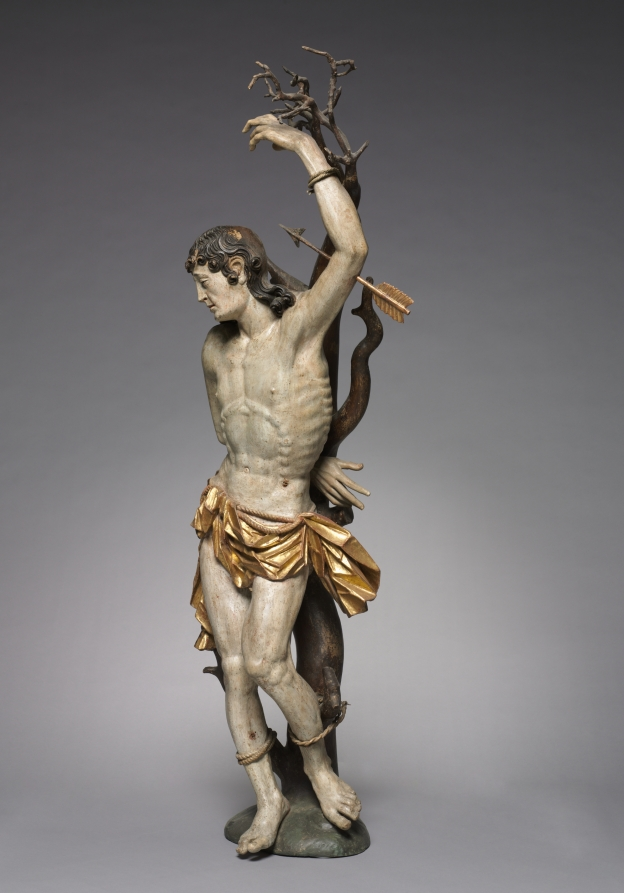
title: Saint Sebastian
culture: Germany, early 17th century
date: c. 1600–1620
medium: painted and gilded wood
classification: Sculpture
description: An early Christian saint and martyr, Sebastian was condemned to death by the Roman emperor Diocletian. Bound to a tree and shot with arrows, he survived—only later to be martyred by beating. This figure embodies the blend of stylistic influences that characterized German sculpture in the early 1600s. The graceful pose and anatomical naturalism of the legs indicate the influence of Italian Mannerism, while the crisp, stylized patterns of Sebastian’s hair and loincloth recall German Gothic works from the 1400s. The tree to which Sebastian is bound is an actual branch, shaped and refined to its present appearance.